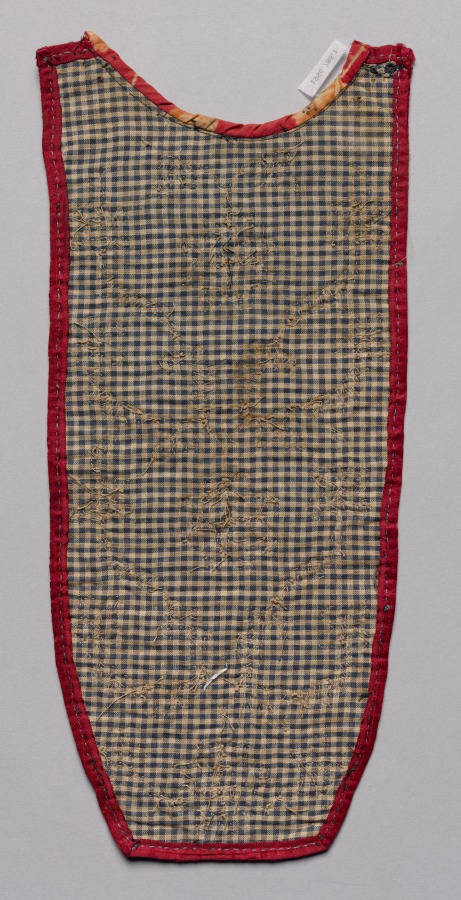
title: Placket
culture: Northeast Woodlands, Great Lakes Region, Anishinaabe (Ojibwe) or Nehiyawak (Cree) People?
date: late 1800s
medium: Velvet, cotton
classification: Garment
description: In the 1800s, native peoples began to use European fabrics to fashion fine formal garments; they favored sturdy cloth, such as velvet and wool broadcloth, which provided support for heavy decorative beadwork that was added by hand. Often the fabric was a dark color, providing dramatic contrast for the multicolored beads. Rather than encrusting the entire garment, beadwork was confined to cuffs, “epaulettes,” bib-like plackets and yokes, rectangular panels sewn to leggings, shirts, and dresses, and the like.